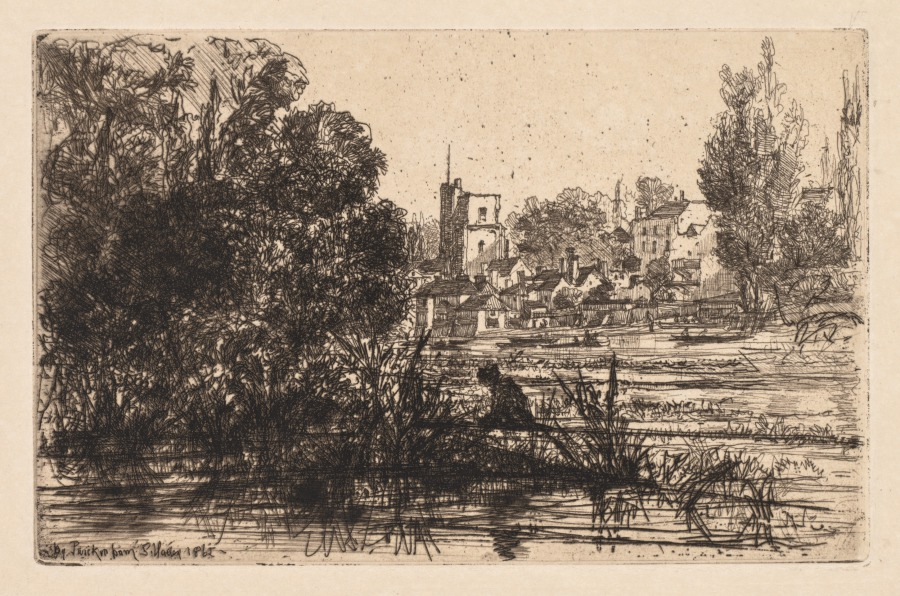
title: Twickenham Church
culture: Britain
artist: Francis Seymour Haden (British, 1818–1910)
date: 1865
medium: etching and drypoint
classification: Print